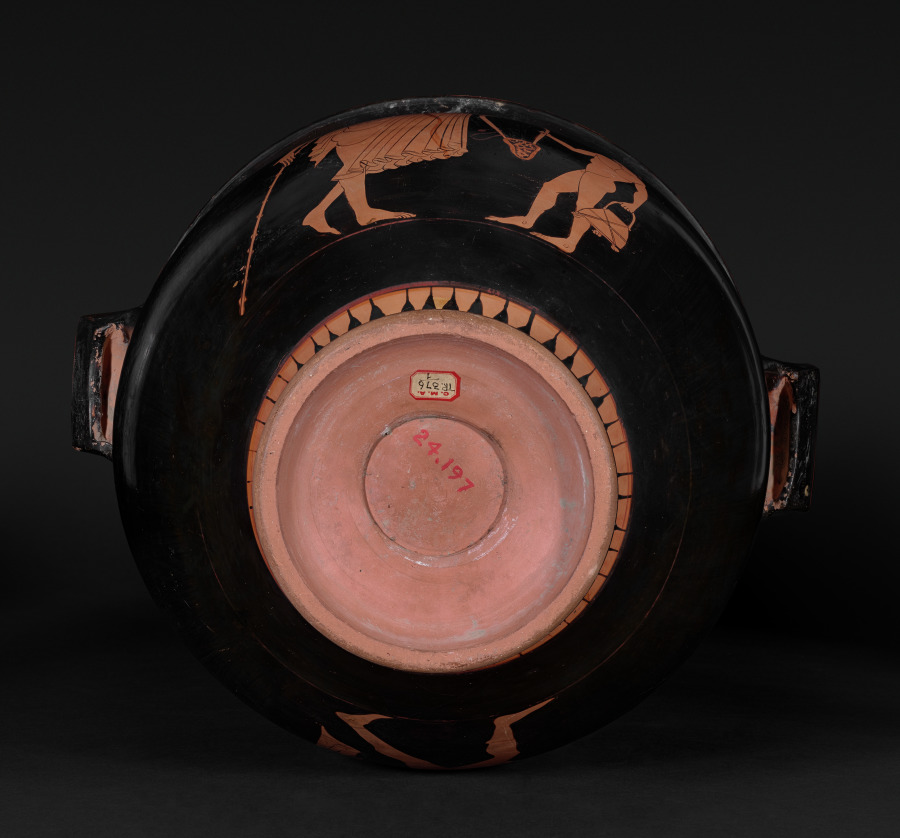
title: Red-Figure Column Krater (Mixing Vessel): Komos (Revel)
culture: Greek, Attic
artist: attributed to Pig Painter (Greek, Attic, active c. 480–460 BCE)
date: 470–460 BCE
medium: ceramic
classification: Ceramic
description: Used for mixing wine and water at a symposium (or drinking party), this column-krater speaks to the perils and pleasures of drinking. On one side, a bearded man holding a staff and a drinking cup leans forward, a red stream of vomit falling from his mouth. Before him is a nude young boy, holding a tortoiseshell lyre and a basket or pail. On the other side, a young man dances, holding a deep cup and wearing just one boot. On the neck above him, scratched in large letters, is the name SIMONOS, probably indicating that the vase once belonged to someone named Simon.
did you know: The bearded man on this vase is vomiting—perhaps a humorous warning against over imbibing.